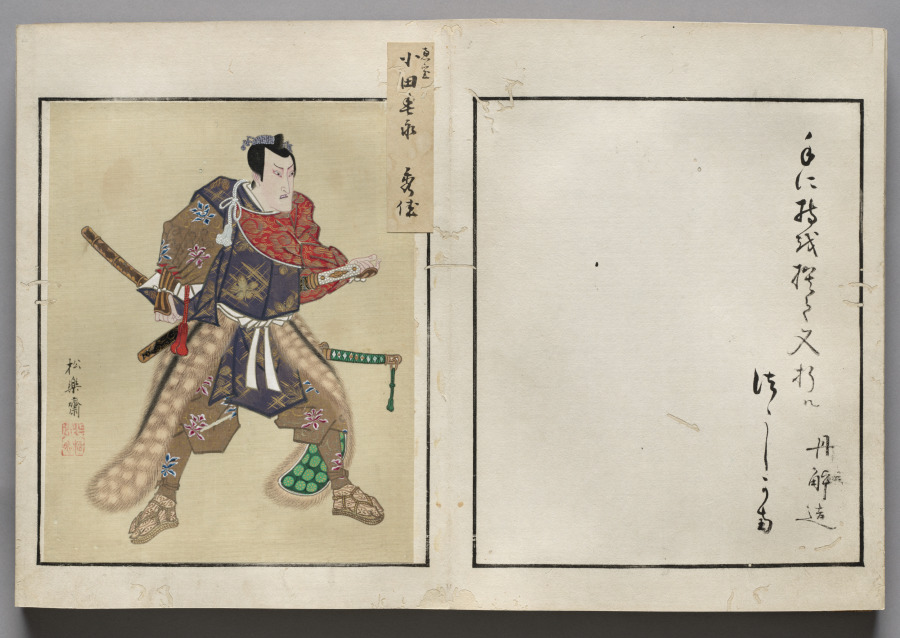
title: Double-Leaf from Album of Actor Portraits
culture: Japan, Edo period (1615–1868)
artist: Shōrakusai (Japanese)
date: c. 1790–1810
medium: double-leaf from an accordion-style album; ink and color on silk (left)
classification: Bound Volume